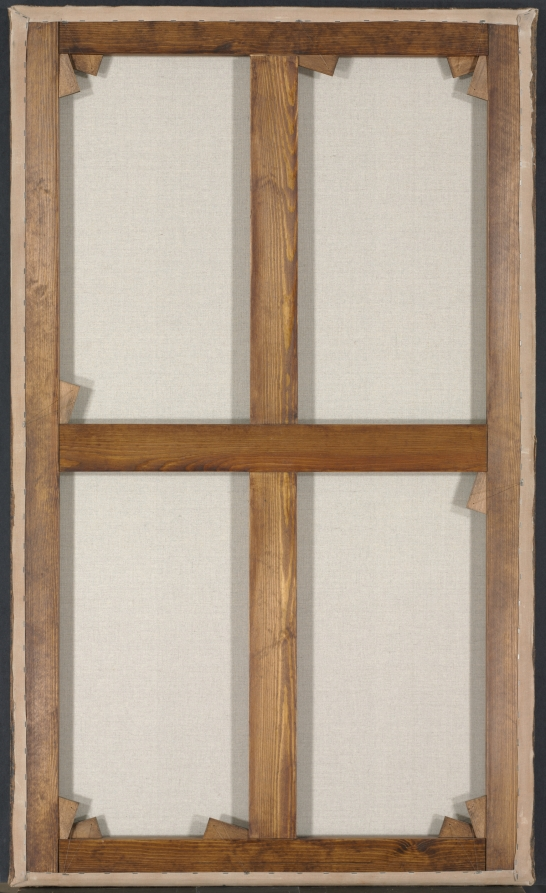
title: Portrait of King Louis XIII of France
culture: Flanders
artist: Frans Pourbus (Flemish, 1569–1622)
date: 1611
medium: oil on canvas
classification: Painting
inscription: Signed with the monogram lower right: F.P. FACIEBAT. Inscribed middle right: AN° SAL. 1611. AETA'. SVAE. A°. 10. Inscribed with inventory number lower left 783. Inscribed on the reverse, on a hand written label: brought back from Rome by J. W. Brigstocke of Carmarthen.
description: Although ten-year-old Louis XIII was king of France, his mother Marie de’ Medici remained in power until the boy officially came of age. Pourbus inscribed the sitter’s age and the painting’s year in the composition: “The holy year 1611 at his age of 10 years.” Marie de’ Medici commissioned this work as she negotiated marriages for her two children to Philip III of Spain and Mary Marguerite of Austria, alliances that led to the European domination of the next two centuries by the Bourbon and Habsburg families.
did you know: While the color pink has feminine associations now, it was commonly worn by girls and boys alike in the 1600s.